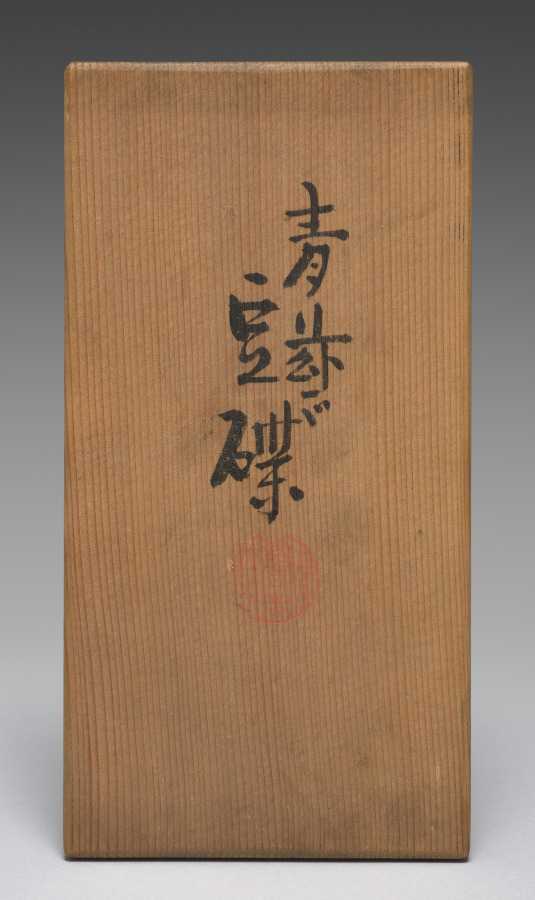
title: Saucers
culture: Japan, Meiji period (1868–1912)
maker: Seifū Yohei III (Japanese, 1851–1914)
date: 1893–1914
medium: Set of ten saucers; porcelain with green glaze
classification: Ceramic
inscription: 清風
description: Yohei III’s main output for his sophisticated clientele was in the form of tea sets and dining sets. He created a range of dishes in green glazes. He often produced in pairs, sets of five, or sets of ten. For this set of ten small dishes in a simple, round form that emphasizes the glaze above all, the box lid designates the piece as seiji, or green-glazed porcelain, using a general term for the extensive palette of green glazes often called celadon in English. The box lid further identifies the dishes themselves as tōchō, literally “bean-sized saucers,” a size that makes them suitable for dipping sauces.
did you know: The ten dishes in this set are stored in stacks of five in a two-compartment box.